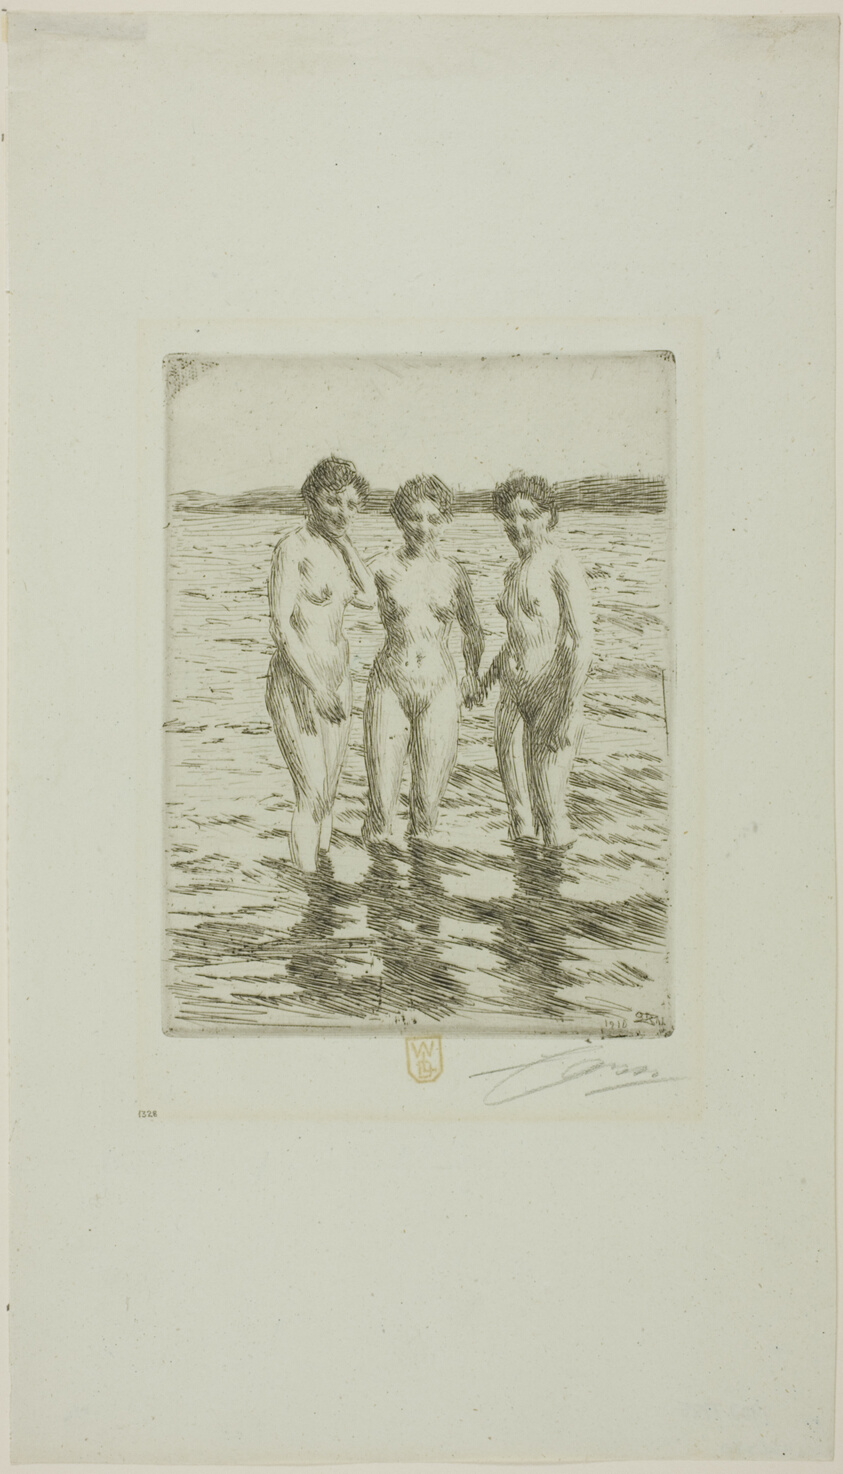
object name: Print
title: The Three Graces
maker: Anders Zorn (Swedish, 1860-1920)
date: 1910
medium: Etching on light blue-green wove paper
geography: Sweden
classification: etching; print; prints and drawing